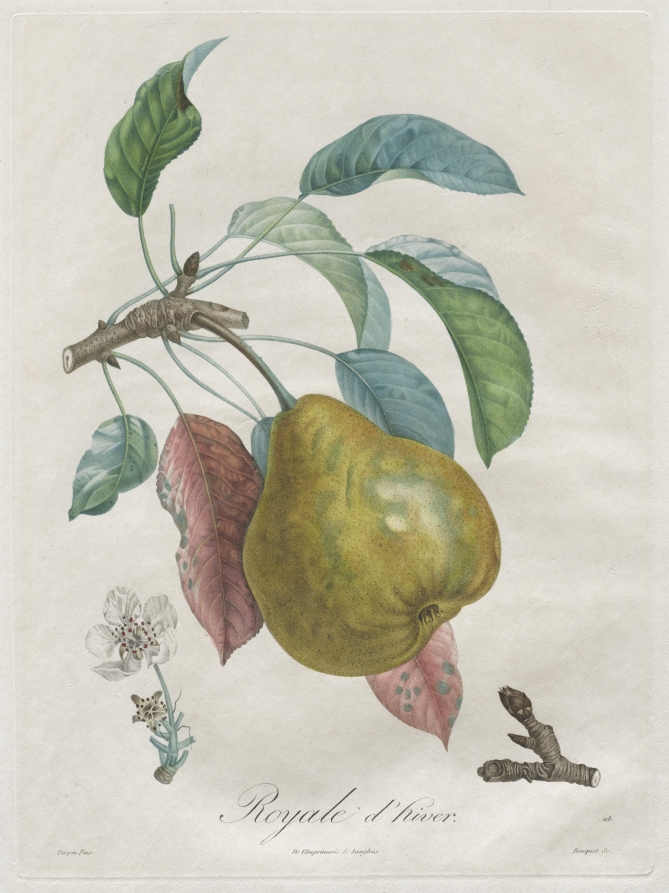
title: Traité des arbres fruitiers: Royal d'hiver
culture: France, 19th century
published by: Henri Louis Duhamel du Monceau (French, 1700–1782)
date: 1808–1835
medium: stipple and line engraving, with hand coloring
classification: Print